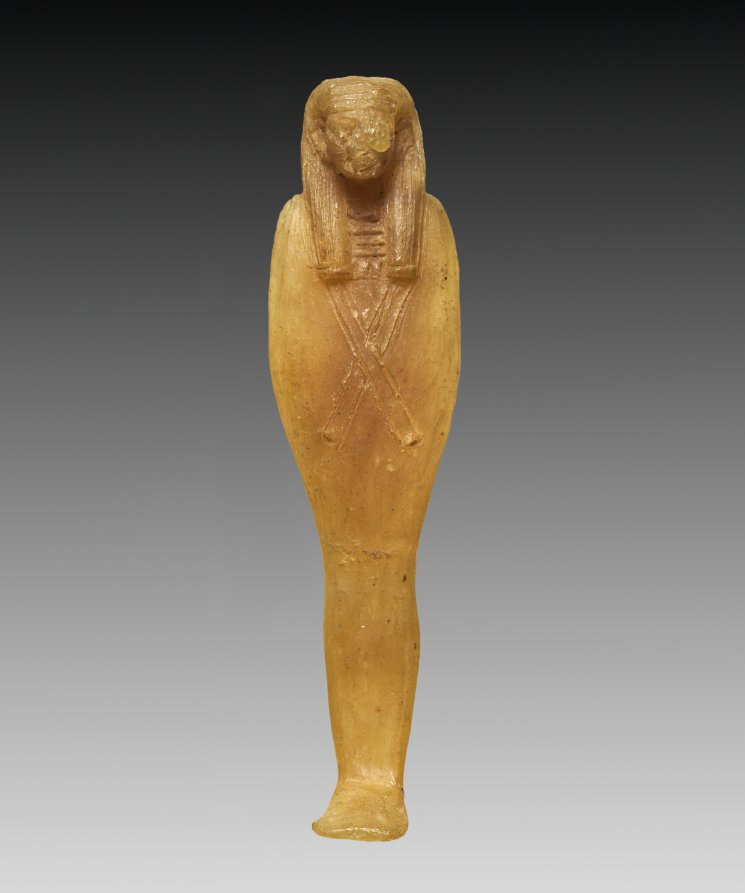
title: Son of Horus: Imsety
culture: Egypt, Third Intermediate (1069–715 BCE), Dynasties 21–22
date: 1000–900 BCE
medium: honey-colored wax with dark amber varnish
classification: Funerary Equipment